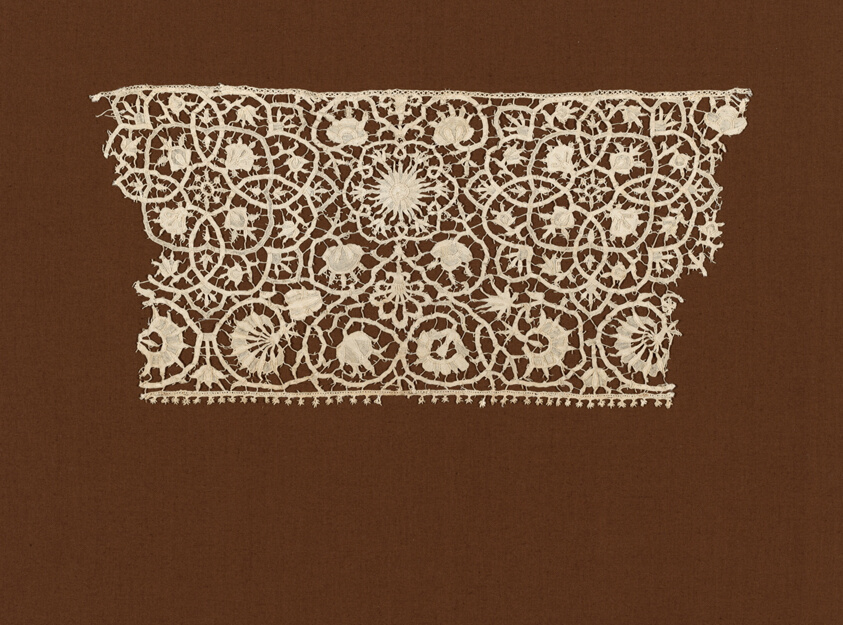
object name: Textile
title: Fragment (Border)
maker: Italy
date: 1620s/30s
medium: Linen, needle lace with needle made tapes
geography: Italy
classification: textile; lace - needle